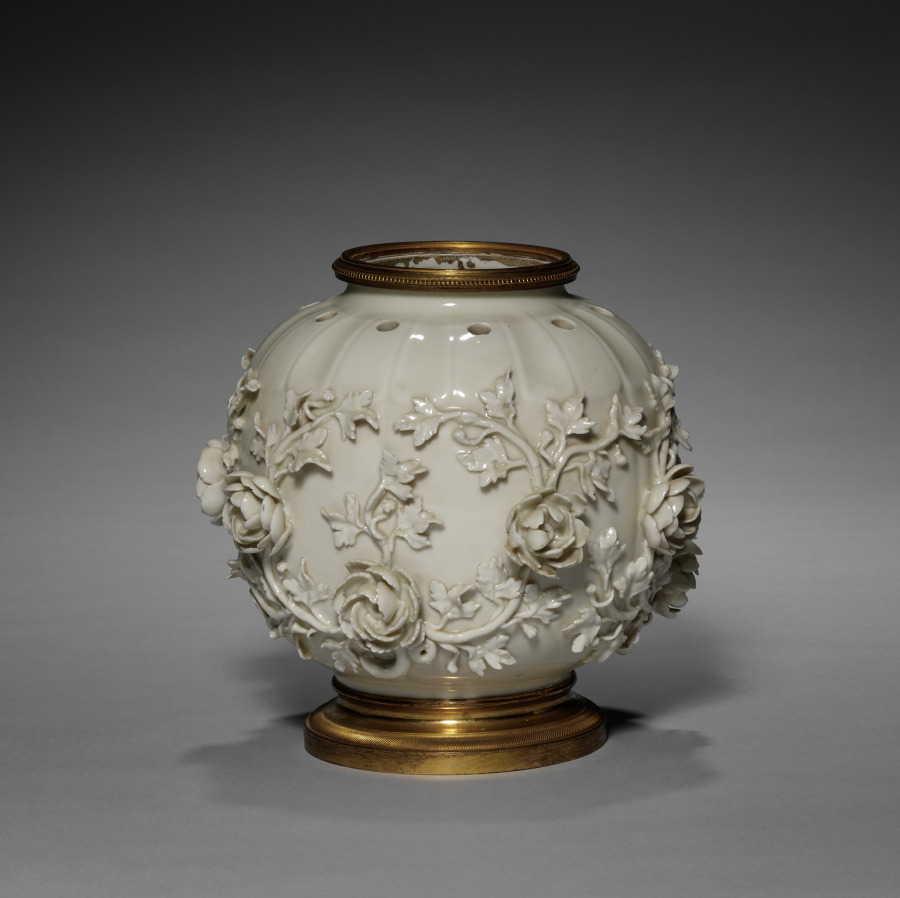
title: Potpourri Vase with Cover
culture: France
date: c. 1860–80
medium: blanc-de-chine porcelain; gilt bronze mount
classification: Ceramic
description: This vase was likely made by the celebrated Parisian ceramics firm of Edmé Samson (1810–91). To cater to the resurgence in taste for 18th-century designs, the Samson firm specialized in making reproductions of rare 18th-century European porcelains, especially those from firms that had already copied Chinese porcelains. In this case, this vase's design is taken from models produced by the Saint-Cloud factory in the 1750s after earlier Qing dynasty Chinese ceramics. However, the telltale sign that this vase is made by Samson and not Saint-Cloud is that the original would have been made from a soft-paste porcelain (fired at a lower temperature), while this example is made of hard-paste porcelain (fired at the highest temperature).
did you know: Potpourri vases always have holes in the top to let the scent of dried spices and flowers contained within freshen the air around them.